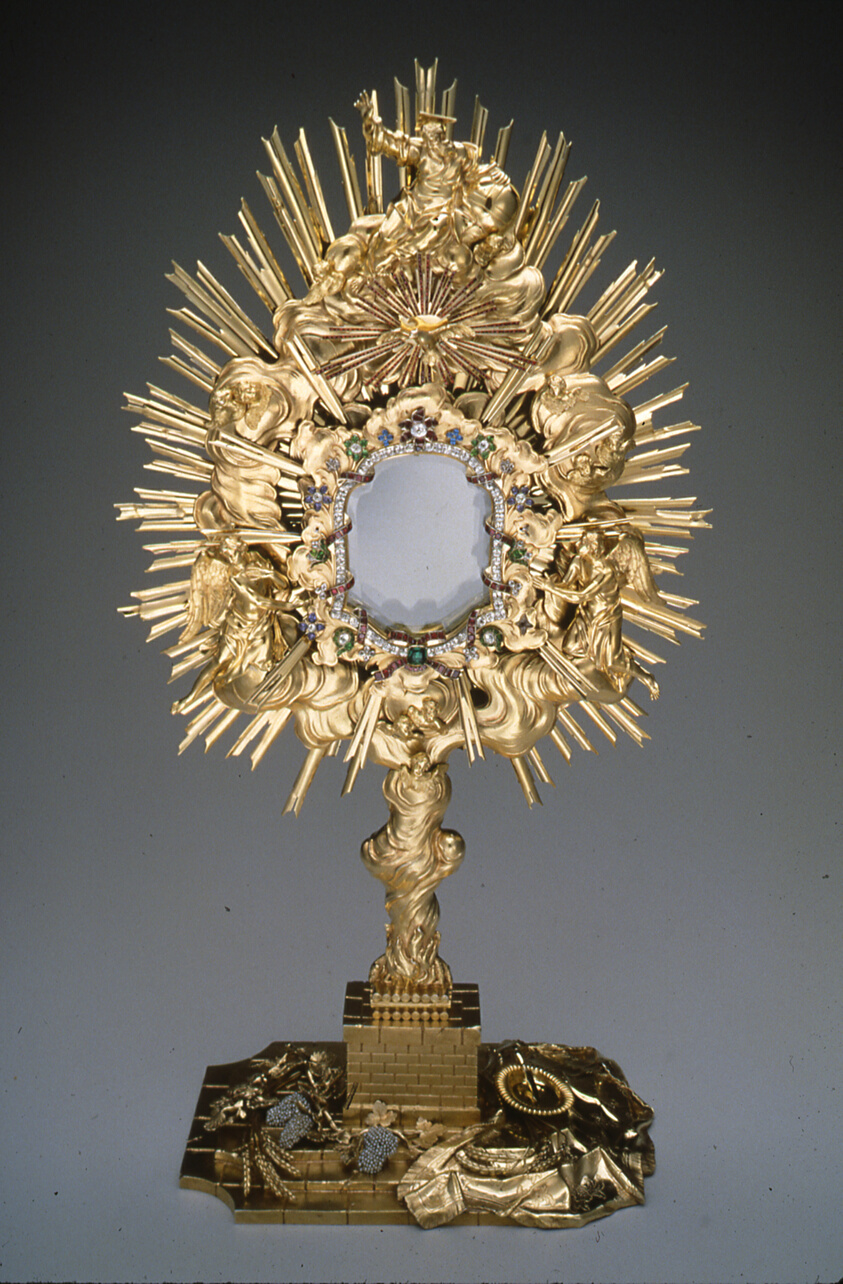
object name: Metalwork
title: Monstrance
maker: Joseph Moser (Austrian, active 1762)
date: 1762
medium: Silver gilt, beveled glass surrounded by seimprecious red, green, blue stones and clear paste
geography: Vienna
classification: silver; metalwork; european decorative arts